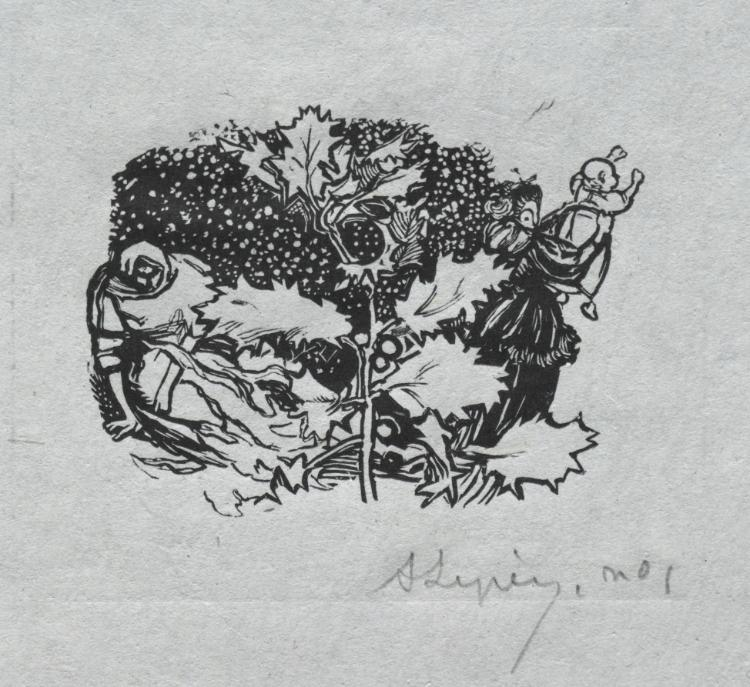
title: Paris Almanac, 1897: Tail-piece, Winter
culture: France, late 19th Century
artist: Auguste Louis Lepère (French, 1849–1918)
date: 1897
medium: wood engraving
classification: Print